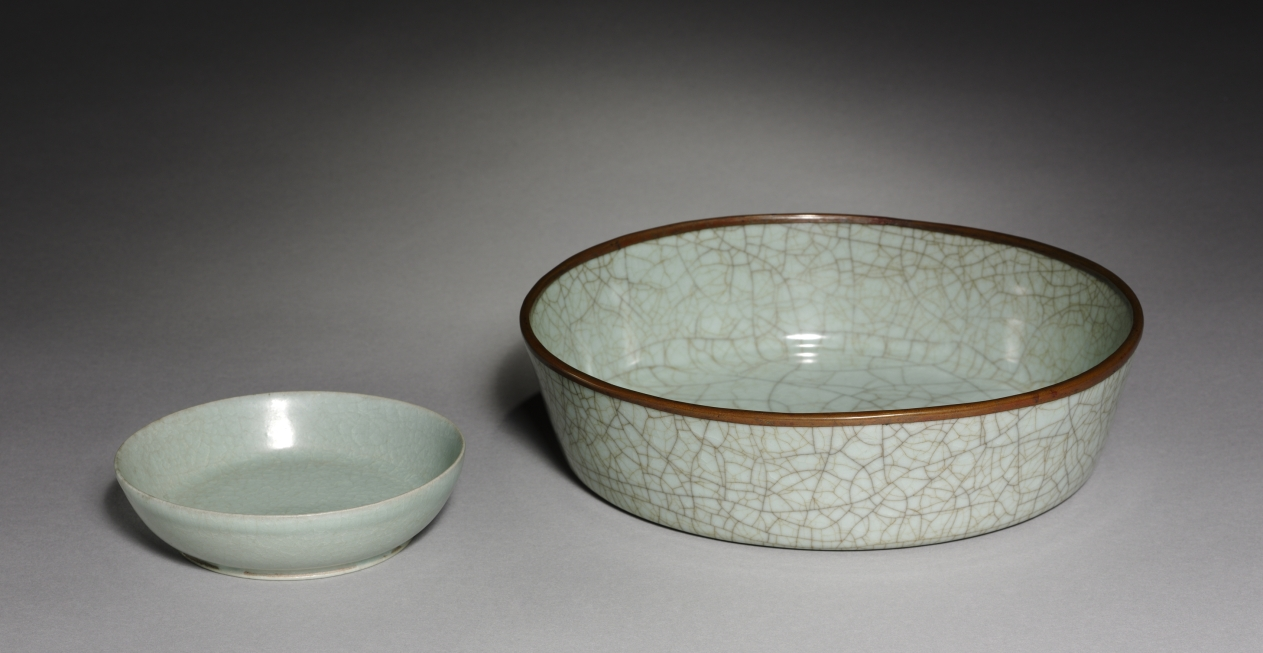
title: Basin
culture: China, Zhejiang province, Hangzhou, Southern Song dynasty (1127-1279)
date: 1127–1279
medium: porcelaneous stoneware, Guan ware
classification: Ceramic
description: Guan ware was the official ware fired at the Southern Song imperial kilns in Hangzhou. Multiple glazing is characteristic of this ware. The total thickness of the glaze can be greater than the clay body that supports it. Here, the thick gray-green glaze is webbed with a wide network of dark brown crackles as well as finer webs of light golden-brown and colorless crackles. The crackle pattern was developed after firing, due to the different rates of expansion and contraction of the body and the glaze. It was consciously exploited to achieve an aesthetic effect and was stained at different stages during the cooling process.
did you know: The base shows that the basin was fired on 17 small spurs arranged in two concentric circles.